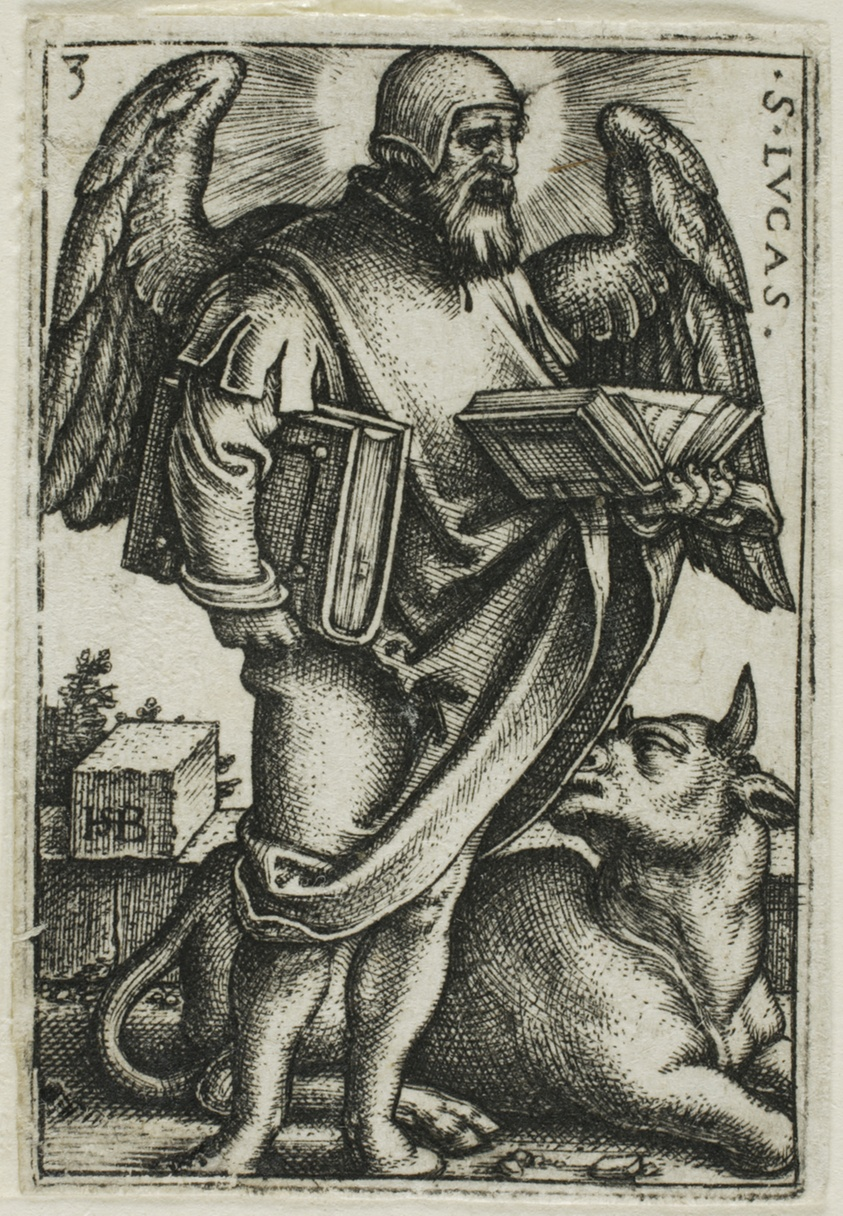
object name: Print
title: St. Luke, from The Four Evangelists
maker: Sebald Beham; German, 1500-1550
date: 1541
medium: Engraving in black on ivory laid paper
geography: Germany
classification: engraving; print; prints and drawing